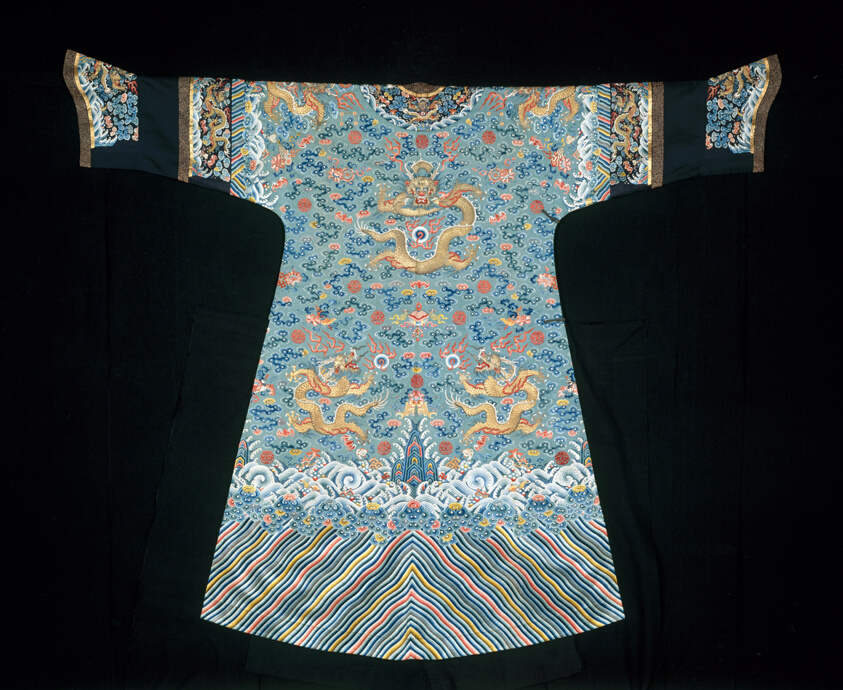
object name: Textile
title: Empress' Jifu (Semiformal Court Robe)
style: qing, Chinese (culture or style), East Asian, asian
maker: Manchu (China)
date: Qing dynasty (1644–1911), 1840-60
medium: Silk, warp-float faced 2:1 'S' twill weave; embroidered with silk, gold-leaf-over-lacquered-paper-strip-wrapped silk, and gilt- and silvered-metal-strip-wrapped silk in knot, satin, and stem stitches; laid work and couching; sleeves: silk, weft-float faced 1:5 and warp-float faced 2:1 twill damask weave; edging and closures: silk and gold-leaf-over-lacquered-paper-strip-wrapped silk, warp-float faced 5:1 satin weave with weft-float faced 1:2 'Z' twill interlacings of secondary binding warps and supplementary patterning wefts; lined with silk, plain weave; metal buttons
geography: China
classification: textile; needlework (visual works)